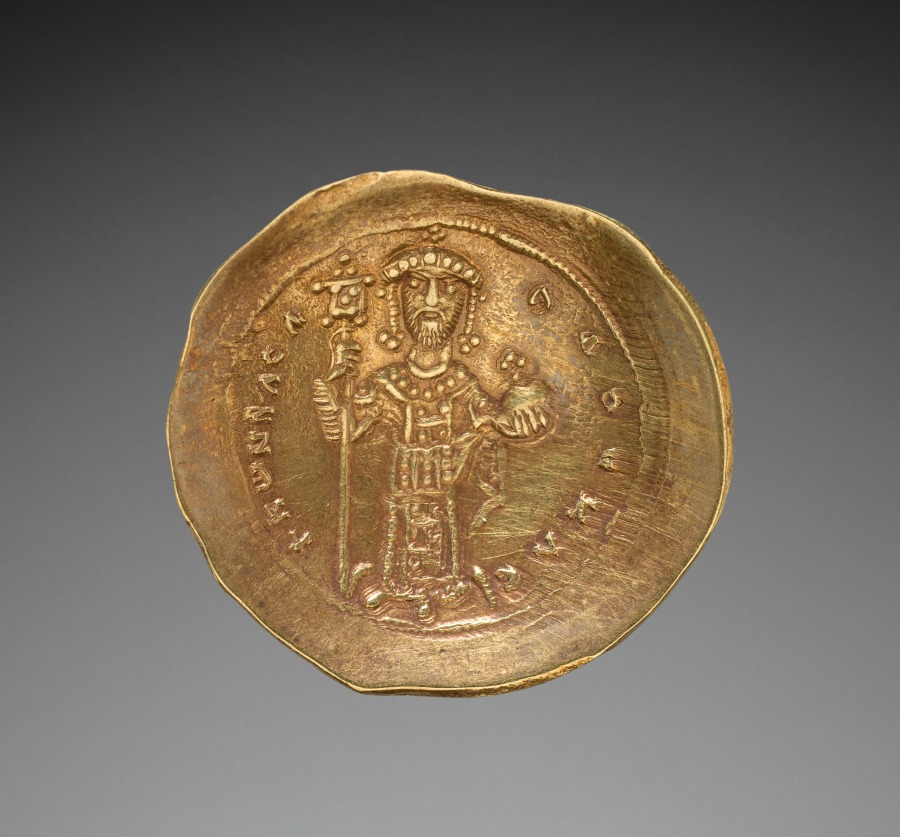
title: Scyphate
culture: Byzantium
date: 1059–1067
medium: gold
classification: Coins